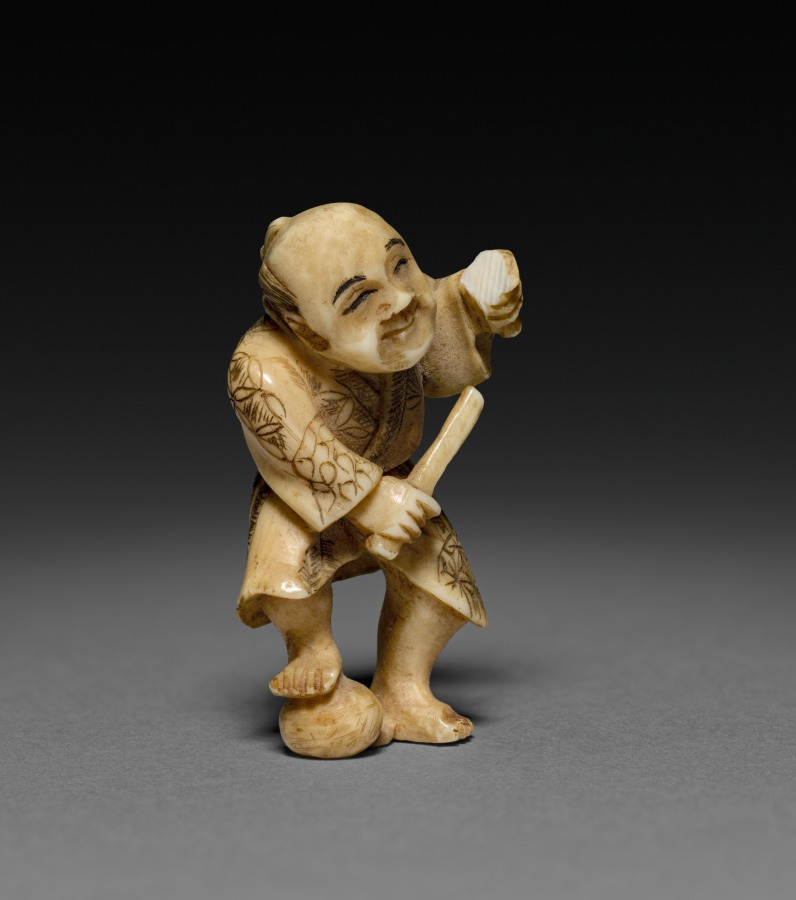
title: Netsuke of Man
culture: Japan, Meiji period (1868–1912)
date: 1900s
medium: ivory, pigment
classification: Ivory